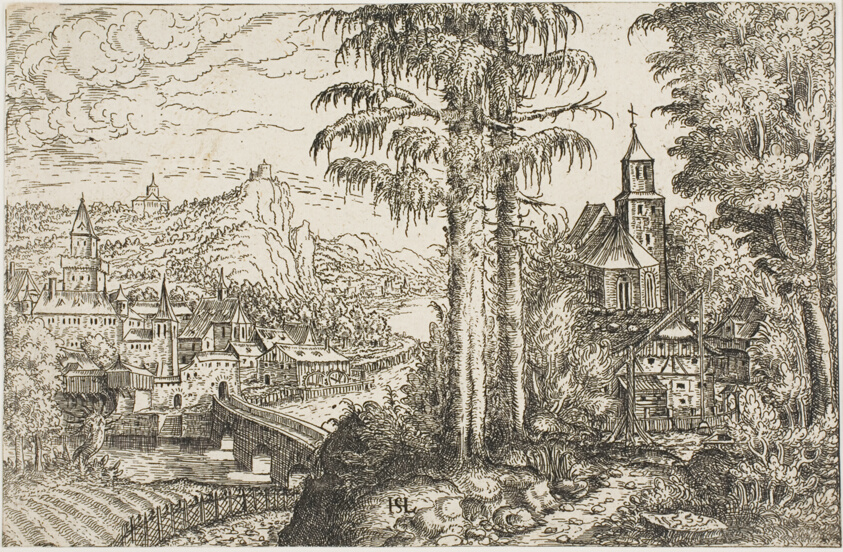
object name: Print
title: Landscape with a Church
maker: Hanns Lautensack (German, 1524-1560/66)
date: 1553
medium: Etching printed on paper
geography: Germany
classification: etching; print; prints and drawing